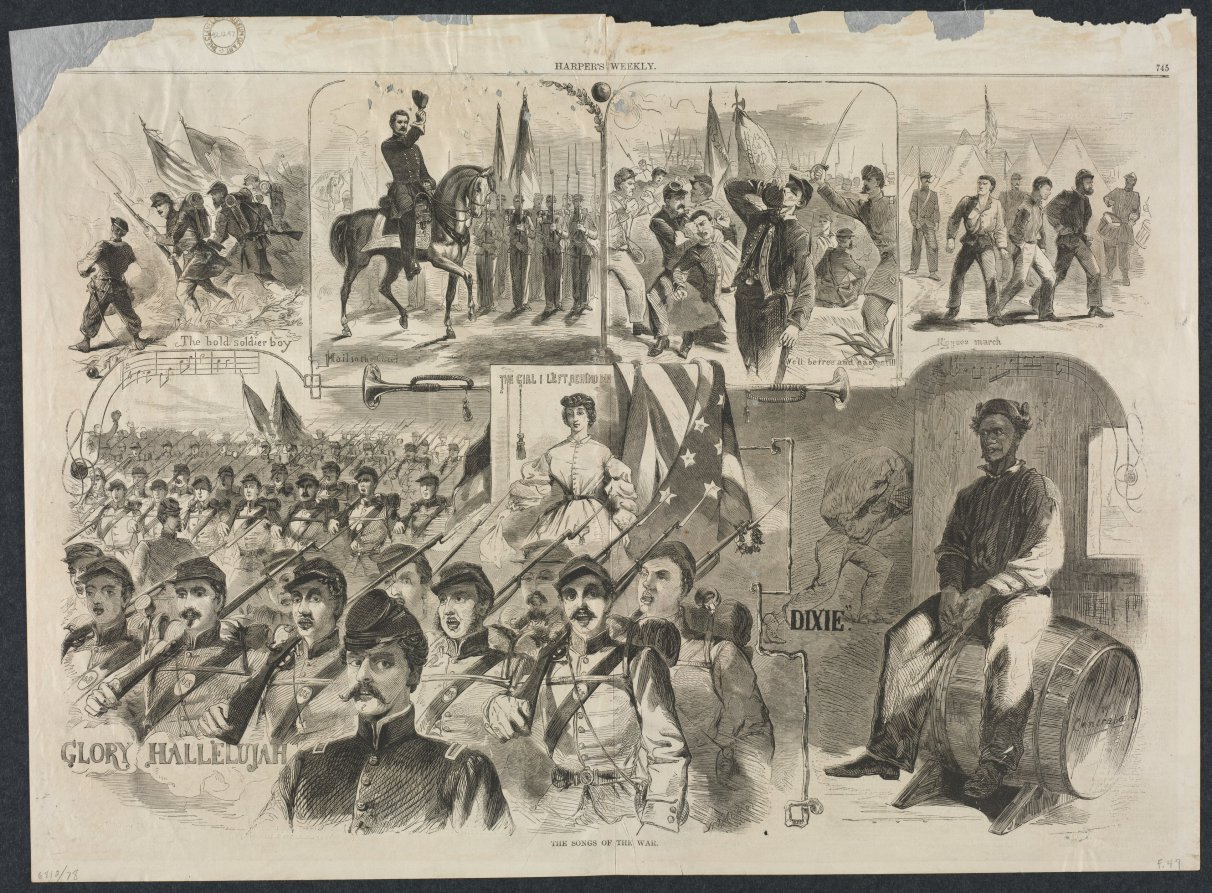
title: The Songs of the War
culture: America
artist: Winslow Homer (American, 1836–1910)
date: 1861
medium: wood engraving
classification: Print